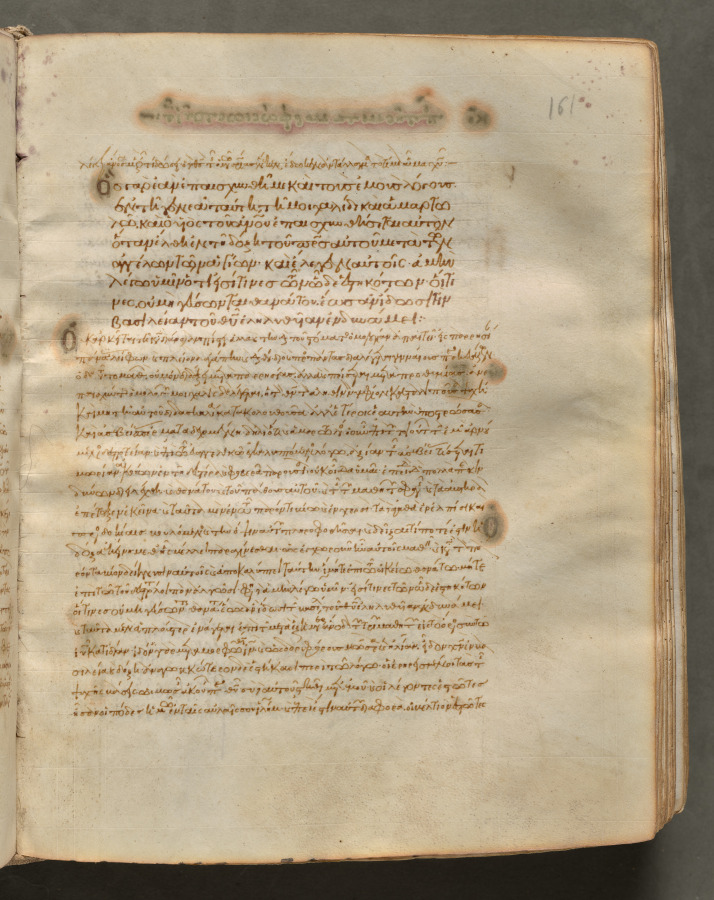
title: Text, folio 161 (recto), from a Gospel Book with Commentaries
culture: Byzantium, Constantinople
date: c. 1000–1100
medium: ink, tempera, and gold on vellum; leather binding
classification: Bound Volume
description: Each of the four gospels in this book opens on a page with brilliantly illuminated borders depicting the author of the text as well as birds-principally peacocks, symbols of the immortality of the soul-and fountains, representing the fountain of life and the salvation of the soul. This volume consists of 428 leaves with texts in Greek. Its level of sophistication suggests that it was probably written and decorated in a monastery in Constantinople.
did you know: Gospel Books were carried in procession through Byzantine churches.